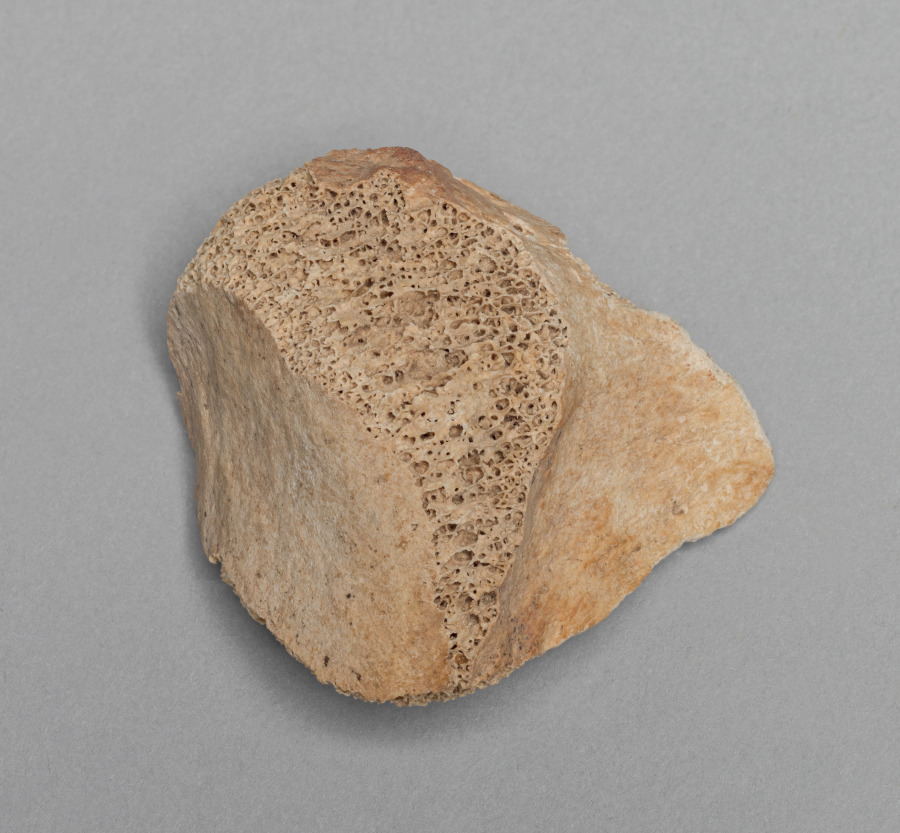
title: Relic of St. Gregory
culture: Germany, Lower Saxony?, Romanesque period, 11th century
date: c. 1045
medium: Bone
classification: Metalwork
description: This relic is housed in the portable altar commissioned by Countess Gertrude of Brunswick, one of the Guelph Treasure’s earliest and most sumptuous objects.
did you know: This bone is a fragment of the proximal tibia or the portion of the shinbone near the top that widens to form the knee joint.